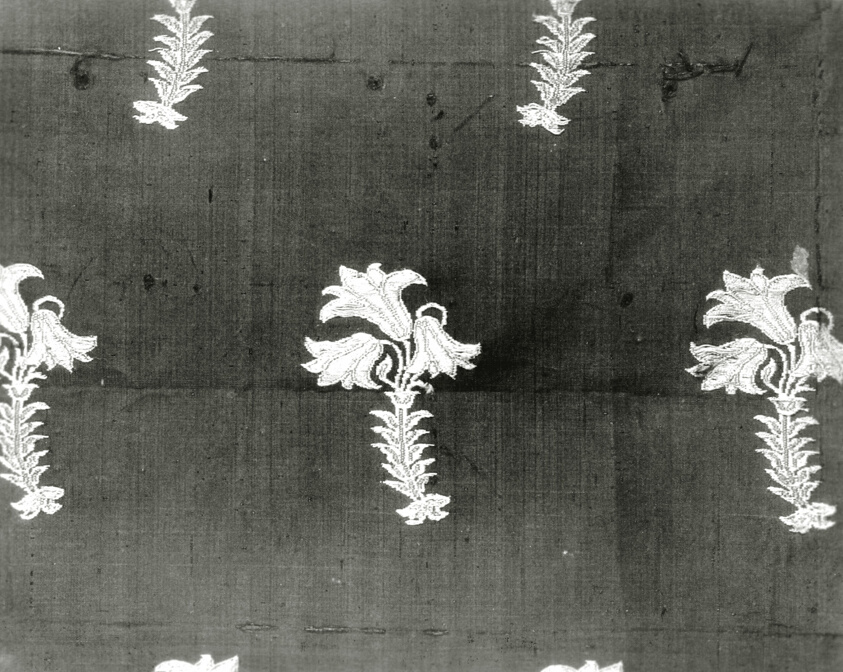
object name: Textile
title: Fragment (Dress Fabric)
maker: Iran (Persia, Isfahan)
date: 18th century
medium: Brocaded plain simple cloth, taffeta, silk, and gold wound on yellow silk core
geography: Iran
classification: textile; weaving